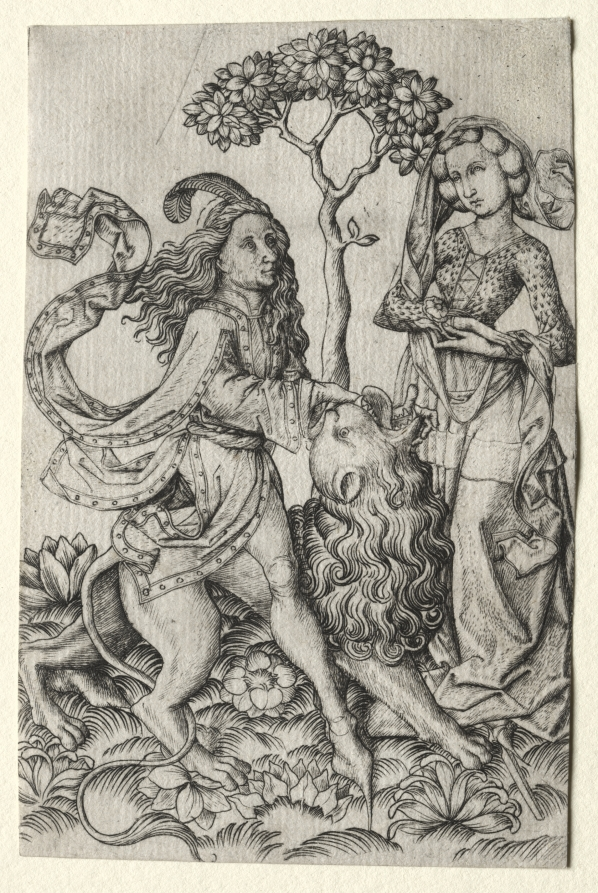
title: Samson Rending the Lion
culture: Germany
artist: Master ES (German, active 1450–67)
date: 1450–67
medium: engraving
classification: Print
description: The biblical hero Samson appears here as a fantastical medieval courtier, proving his courage and strength by slaying a lion with his bare hands. Viewers familiar with Samson’s story would have identified the courtly maiden as the woman of Timnah, a heathen who marries Samson, but betrays him during their wedding. The idea that even history’s greatest men succumbed to the power of women was a popular one in early prints.